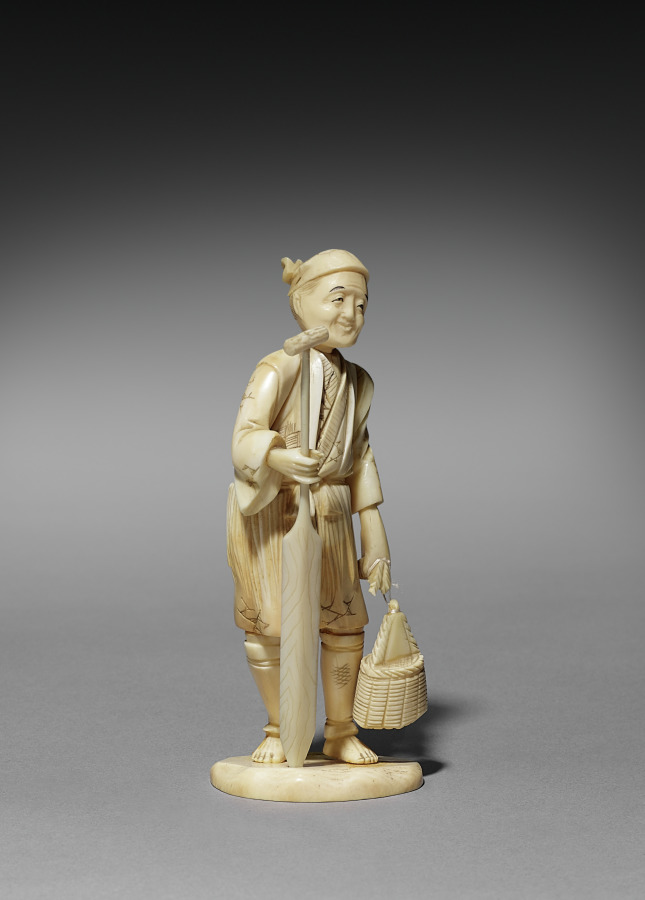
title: Man with a Basket and Paddle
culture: Japan, Meiji period (1868–1912)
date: late 1800s-early 1900s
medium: ivory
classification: Ivory